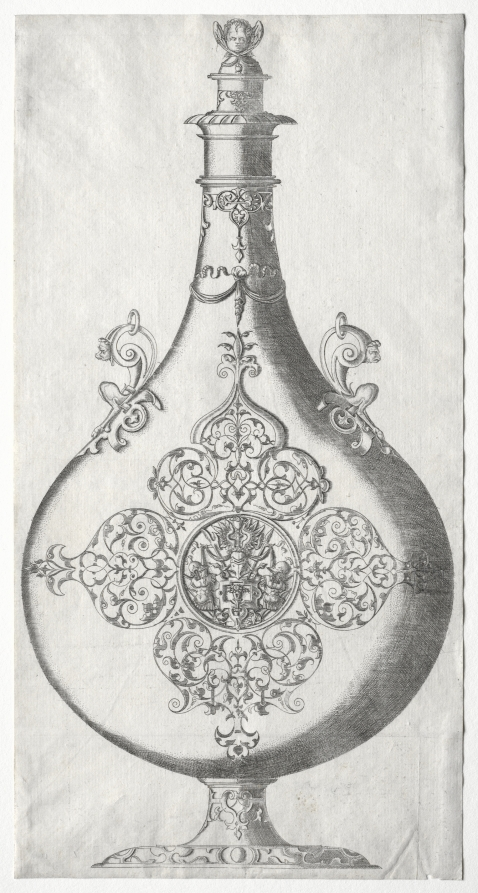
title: Pear-shaped Bottle with Trophy of Arms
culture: Germany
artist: Mathis Zündt (German, c. 1498–1572)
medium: etching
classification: Print